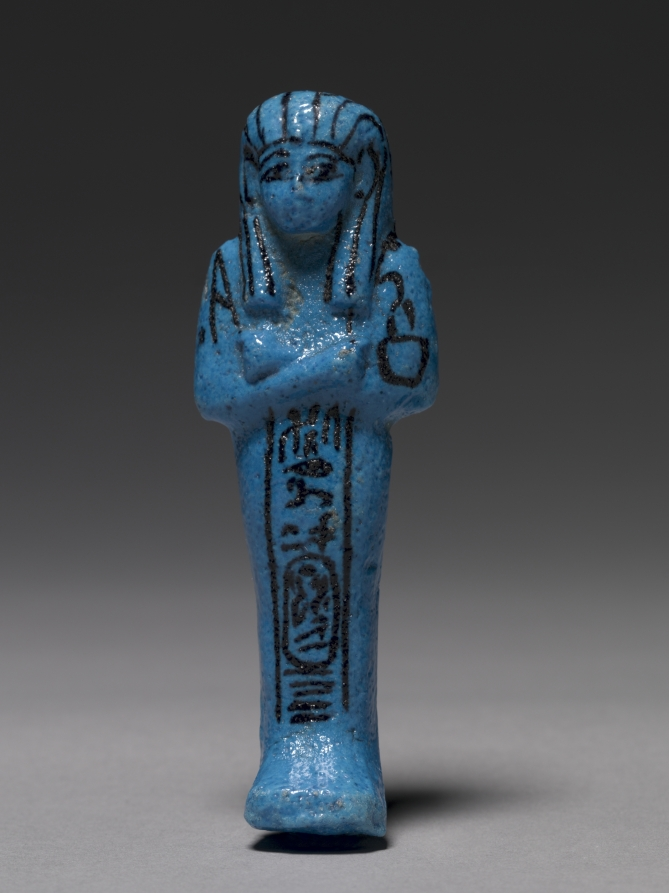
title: Shawabty of Pinudjem I, High Priest of Amen and King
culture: Egypt, Third Intermediate (1069–715 BCE), Dynasty 21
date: c. 990–969 BCE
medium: bright blue faience with purple details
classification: Funerary Equipment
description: This small mummiform funerary figurine was a surrogate for the deceased that performed menial tasks for its owner in the afterlife. Mold-made and decorated with paint, this shawabty contains the name of a king within a cartouche. The vibrant blue color occurs during the firing process as a chemical reaction with the pigments in the faience paste, in this case added copper.